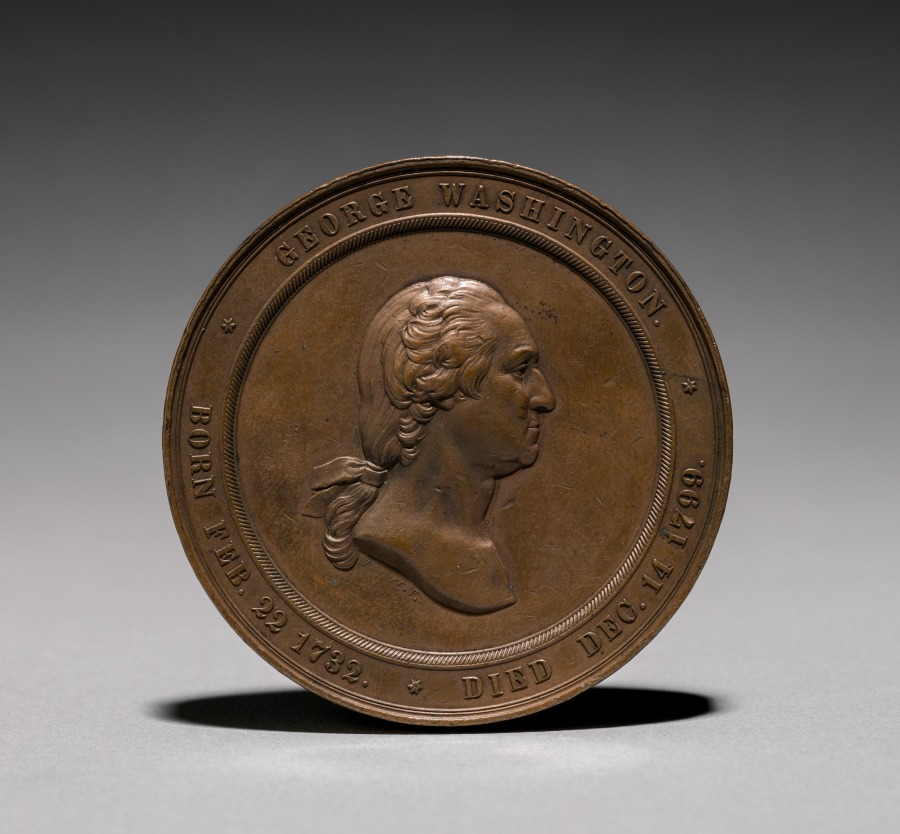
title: Medal: George Washington (obverse)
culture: France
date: 1860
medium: bronze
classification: Metalwork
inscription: George Washington, Born Feb. 22, 1732. Died Dec. 14, 1799.